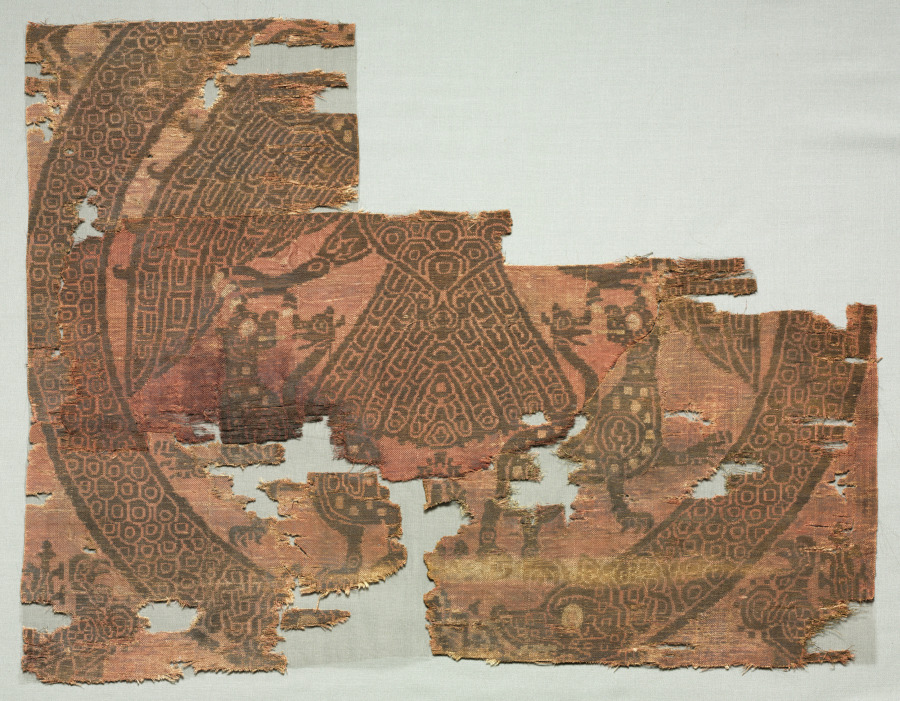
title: Fragment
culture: Byzantium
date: 900s–1000s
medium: Silk and gold: compound twill, brocaded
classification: Textile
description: The design of this textile offers an interesting iconographic puzzle. The double-headed eagle was a common motif in the art of the Near East in ancient times and from there seems to have found its way into Byzantine and European art. The animal tail ending in an animal's head is also found in Near Eastern art and is particularly noted in textiles of the Seljuk period (1000s–1100s) in Persia. However, the division of the roundel frame into two halves ending in animal heads is not known in the art of the Near East nor is the continuous knot motif which occurs just behind the animal head of the frames. Both of these motifs are familiar in the art of the Anglo-Saxon, Germanic, and Scandinavian peoples of Europe.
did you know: The entire pattern is in gold thread, except for such minor details as claws and eyes which are in golden tan silk on a rose-red ground.